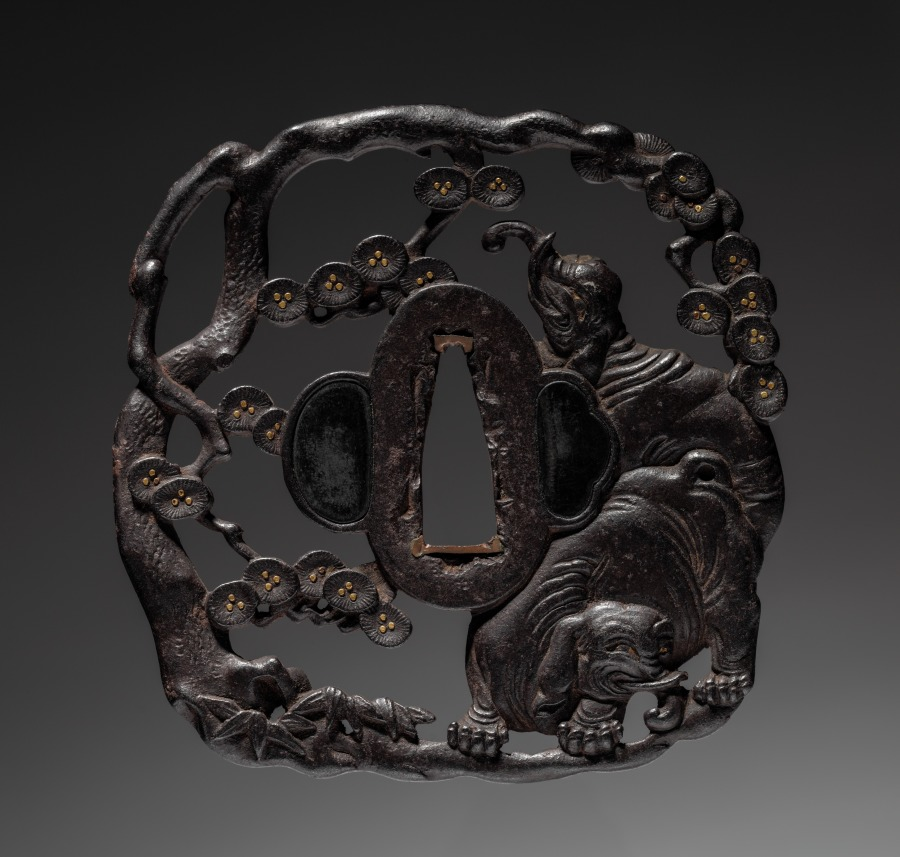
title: Sword Guard (Tsuba) with Elephant in Pine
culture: Japan, Edo period (1615–1868)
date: c. 1800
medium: iron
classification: Arms and Armor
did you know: This sword guard may have been made by the Soten school.